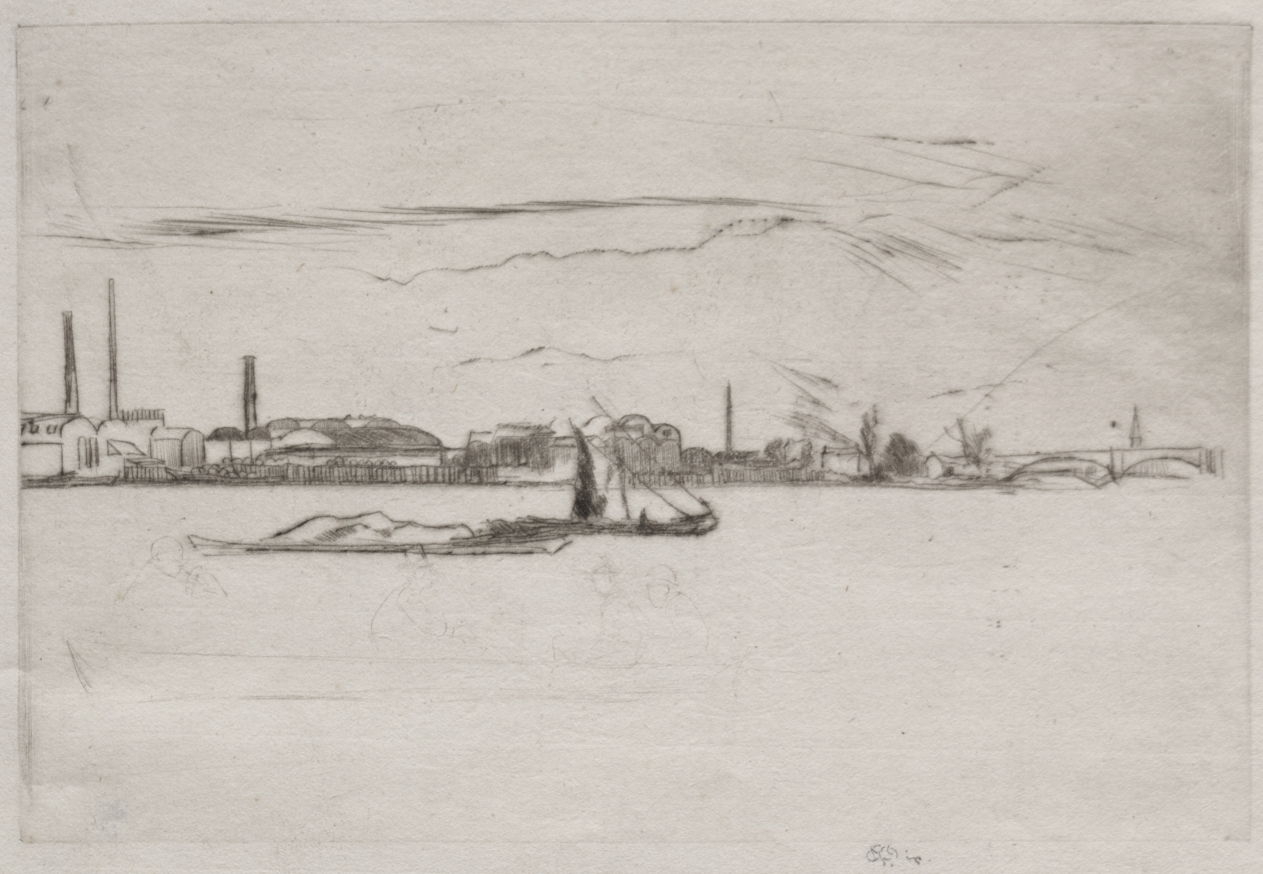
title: Price's Candle-Works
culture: America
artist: James McNeill Whistler (American, 1834–1903)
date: 1876–77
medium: etching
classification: Print